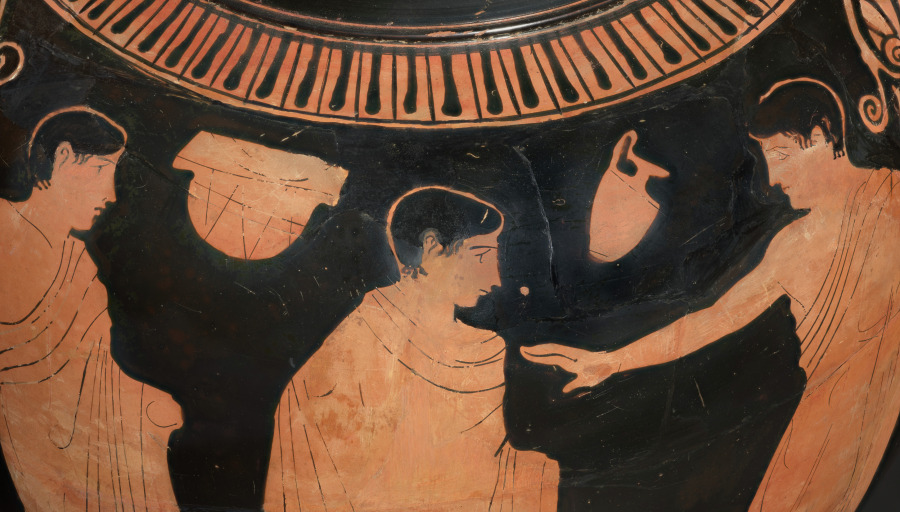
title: Red-Figure Stamnos (Mixing/Storage Vessel): Komos (Musicians and Revelers)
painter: attributed to Kleophon Painter (Greek, Attic, active c. 440–410 BCE)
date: c. 435–425 BCE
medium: Ceramic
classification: Ceramic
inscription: Κ Α Λ Ο Σ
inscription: Κ Α Λ Ο [Σ]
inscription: black '080'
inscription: black 'WF2'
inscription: black '0.19'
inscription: red '09.6'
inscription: partially removed red and white sticker, with number blacked out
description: Four lively figures move to the right across the front side of this stamnos, a vase used for storing and mixing wine. First comes a finely dressed woman playing the pipes, followed by three male figures, all nearly nude. The bearded one holds a drinking cup and reaches back, perhaps dancing, while the last in line concentrates on the music of his lyre.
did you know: The Athenian stamnos, a shape favored by the Etruscans, was made primarily for export.